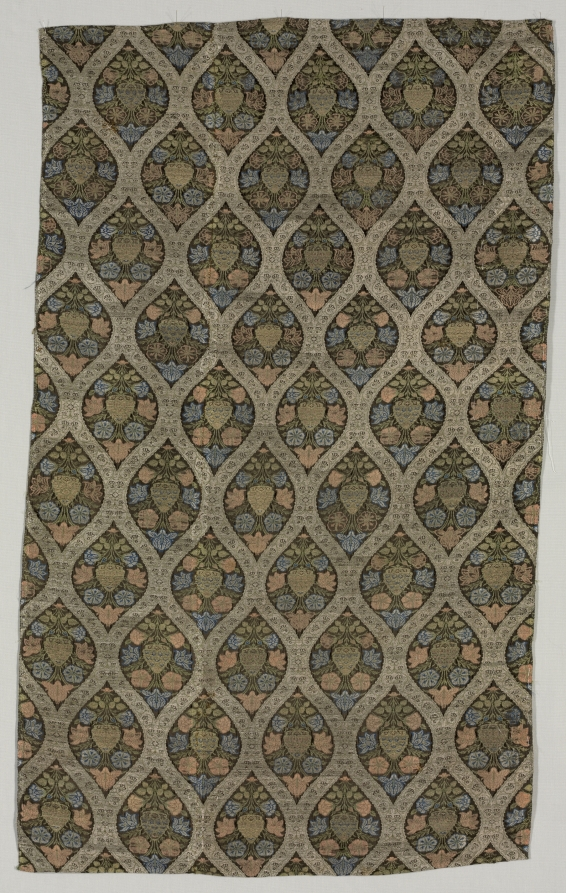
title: Lampas fragment with blossoms in ogival lattice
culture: Iran, Safavid period (1501–1722)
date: 1600s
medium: Silk and silver-metal thread: lampas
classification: Textile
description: The Iranian love of gardens was celebrated in poetry, yet textile patterns composed of blossoming plants only became fashionable in the 1630s, most likely inspired by European botanical engravings, and they dominated for the next 200 years. This design of composite plants within a curving ogival lattice is typically Iranian in the combination of blossoms with a prominent iris, range of colors, and technique with wefts floating, rather than bound in, across the back. However, the lattice layout framing blossoms were, on a larger scale, a hallmark of Ottoman Turkey.